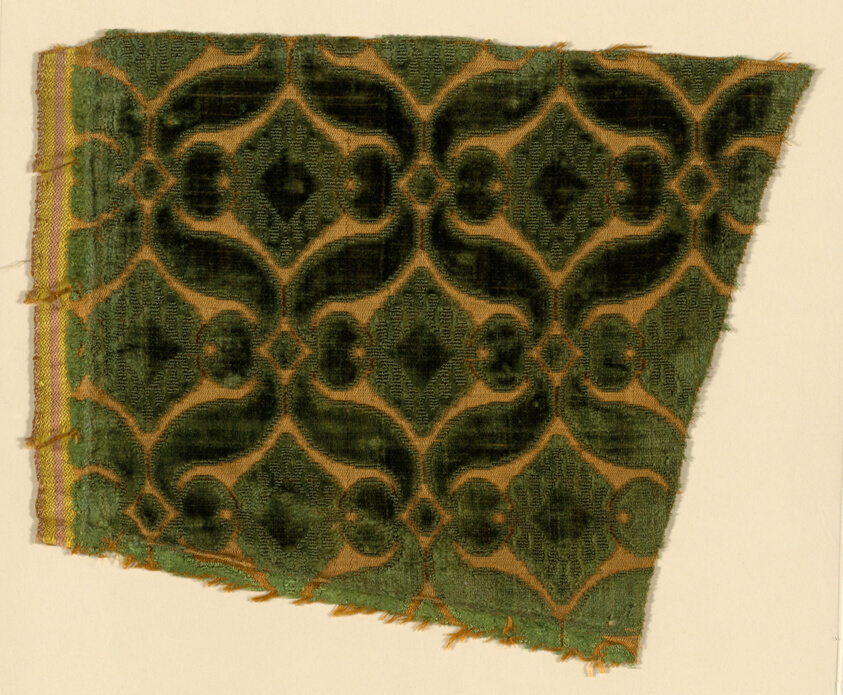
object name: Textile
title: Fragment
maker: Italy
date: c. 1600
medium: Silk, warp-float faced satin weave with supplementary pile warps forming cut, uncut, and voided velvet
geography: Italy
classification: textile; weaving - velvet